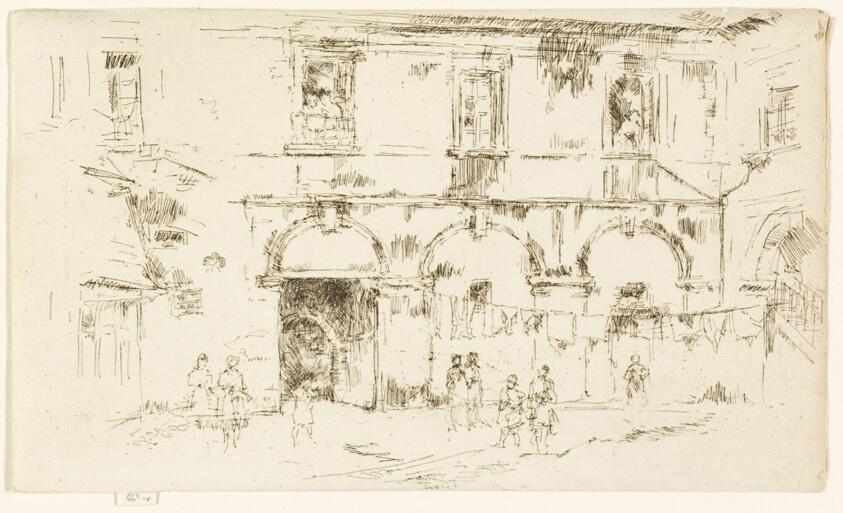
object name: Print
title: Court of the Monastery of St Augustine, Bourges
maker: James McNeill Whistler (American, 1834-1903)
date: 1888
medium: Etching with foul biting in dark brown ink on ivory laid paper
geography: United States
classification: etching; foul biting; print; prints and drawing; paper